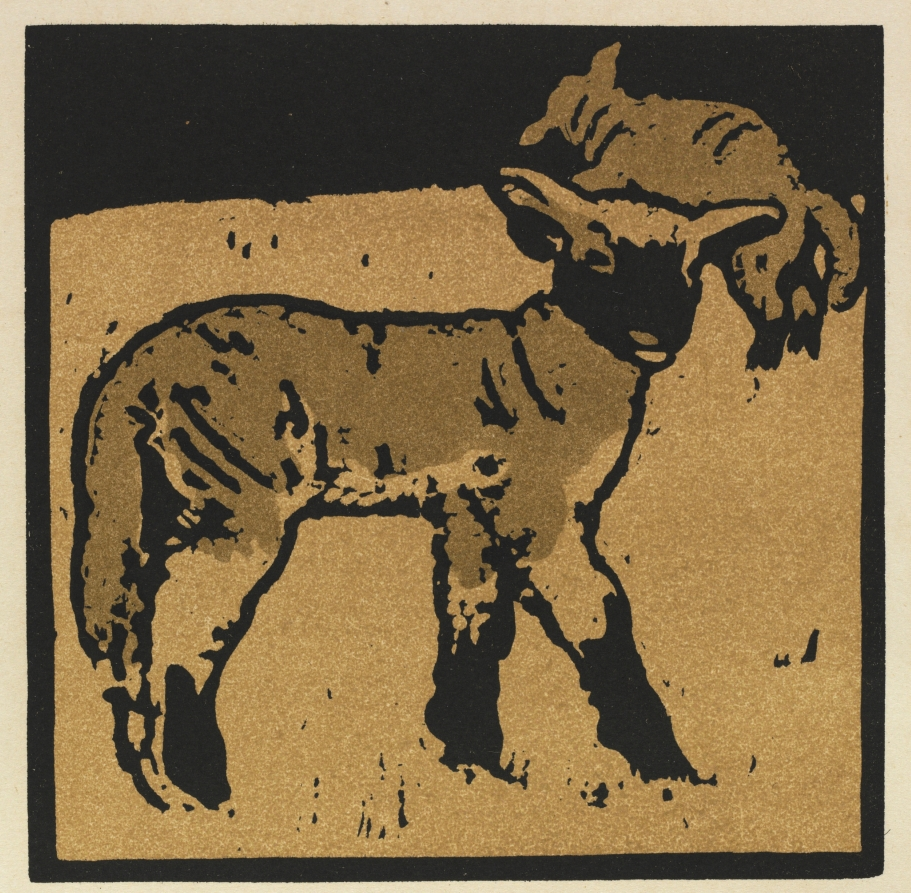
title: The Square Book of Animals: The Very Tame Lamb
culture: England, 19th century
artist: William Nicholson (British, 1872–1949)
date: 1899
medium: color lithograph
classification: Print